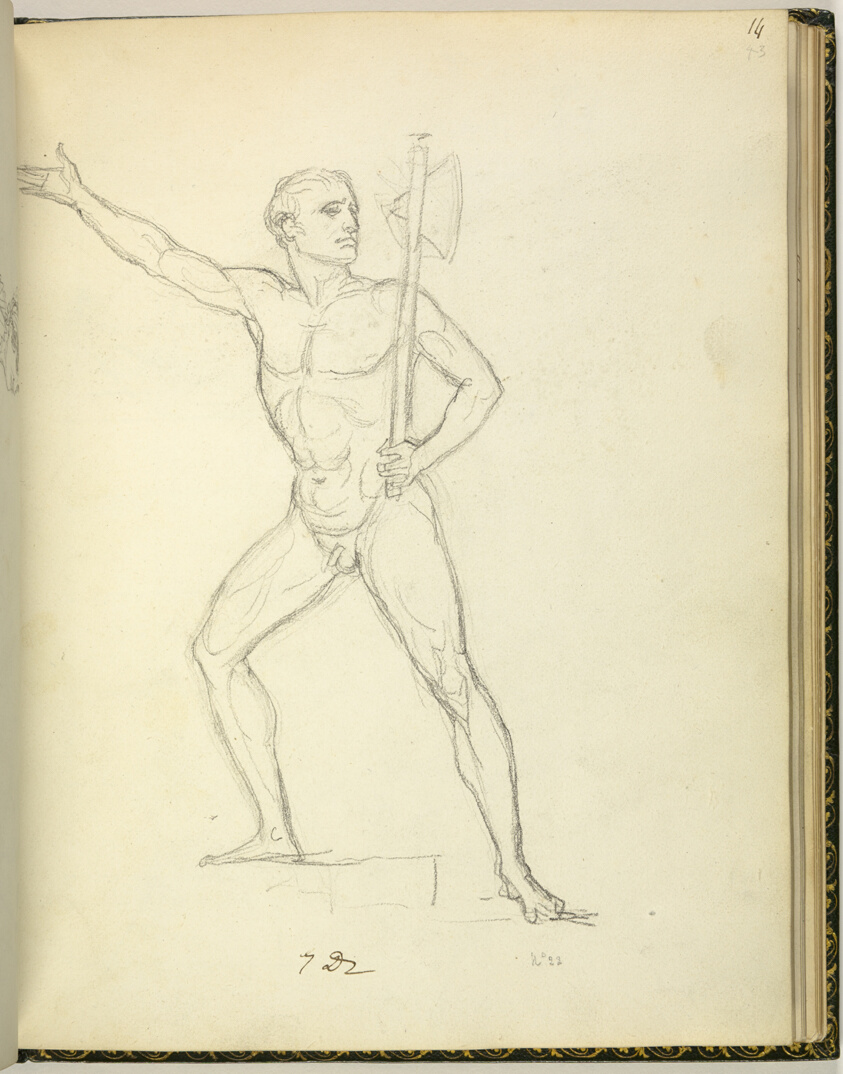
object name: Drawing and Watercolor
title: Sketchbook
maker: Jacques-Louis David; French, 1748-1825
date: 1809–10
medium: Graphite, black chalk, black crayon, and pen and brown ink drawings on wove paper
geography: France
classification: sketchbook; chalk; prints and drawing; paper